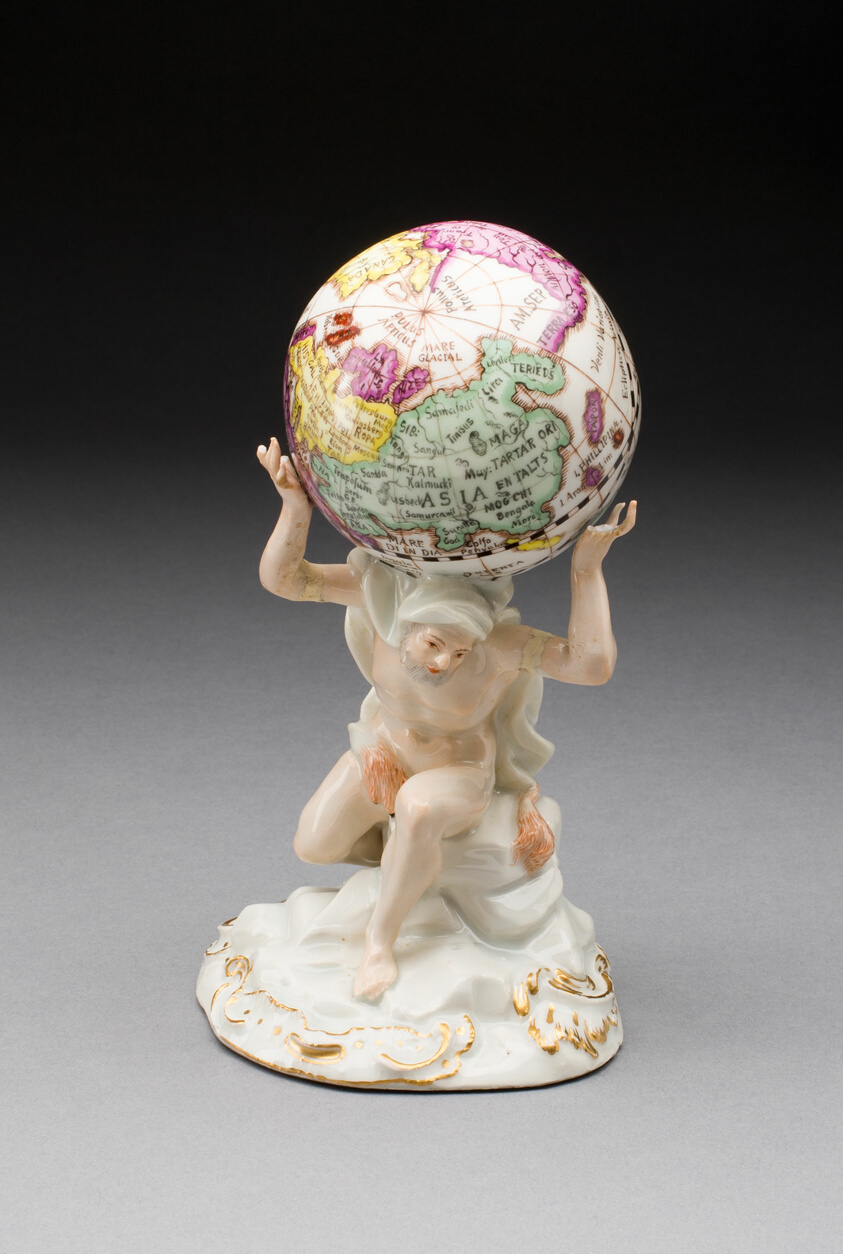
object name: Ceramics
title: Atlas of the World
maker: Meissen Porcelain Manufactory (German, founded 1710)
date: 18th–19th century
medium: Hard-paste porcelain, polychrome enamels, and gilding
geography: Meissen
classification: sculpture; ceramics; porcelain; european decorative arts